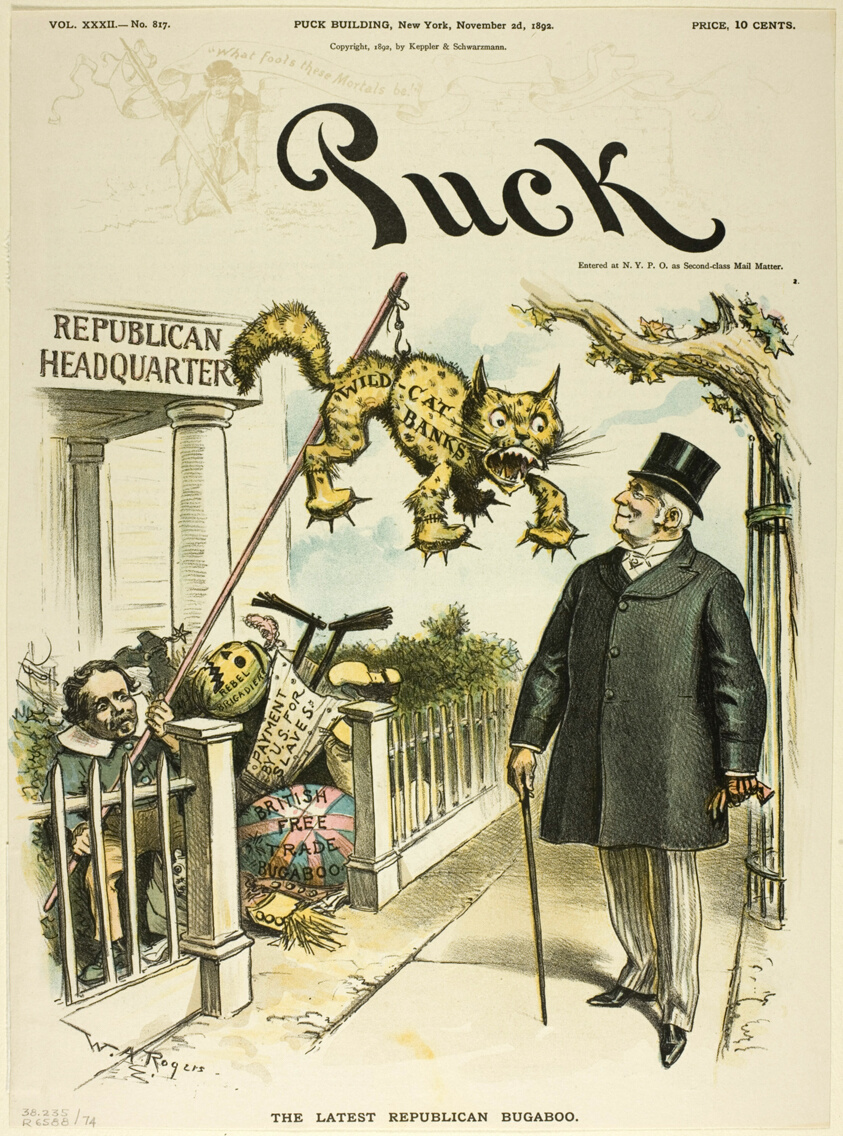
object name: Print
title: The Latest Republican Bugaboo, from Puck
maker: William Allen Rogers (American, 1854-1931)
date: published November 2, 1892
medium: Color lithograph on newsprint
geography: United States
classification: lithograph; print; prints and drawing